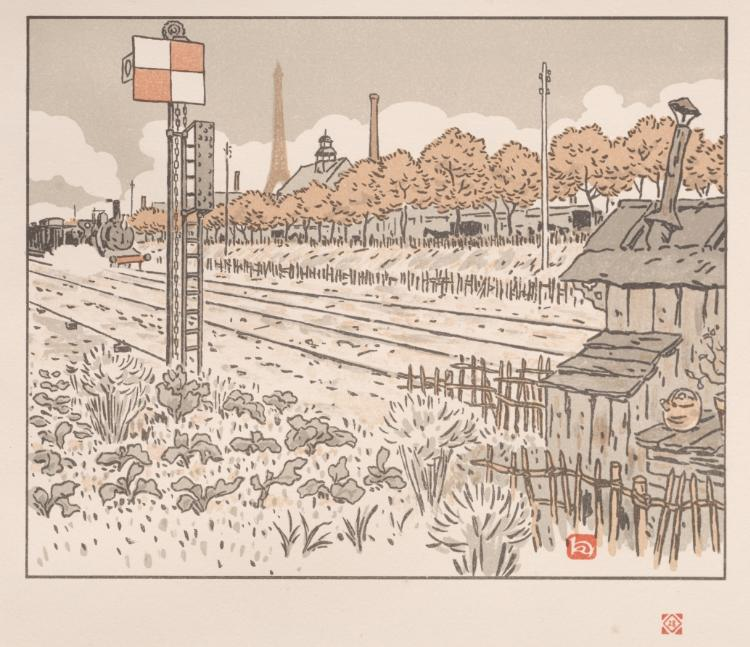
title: Thirty-Six Views of the Eiffel Tower: From the Quai de Javel (Switchman's Shanty)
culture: France, early 20th century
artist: Henri Rivière (French, 1864–1951)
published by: Printed by Verneau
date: 1902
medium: color lithograph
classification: Print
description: The switchman’s principal duty was to switch tracks to direct an oncoming train to its destination, regulate a train’s speed, and signal the open track to the train conductor. The red and white checkered flag was used for the latter purpose and was placed on the side of the open tracks. The switchman was also responsible for manning the telegraph, whose white poles line the opposite side of the tracks. When he was off duty, the switchman grew vegetables on the bank bordering the railway, as was the custom with railway workers.